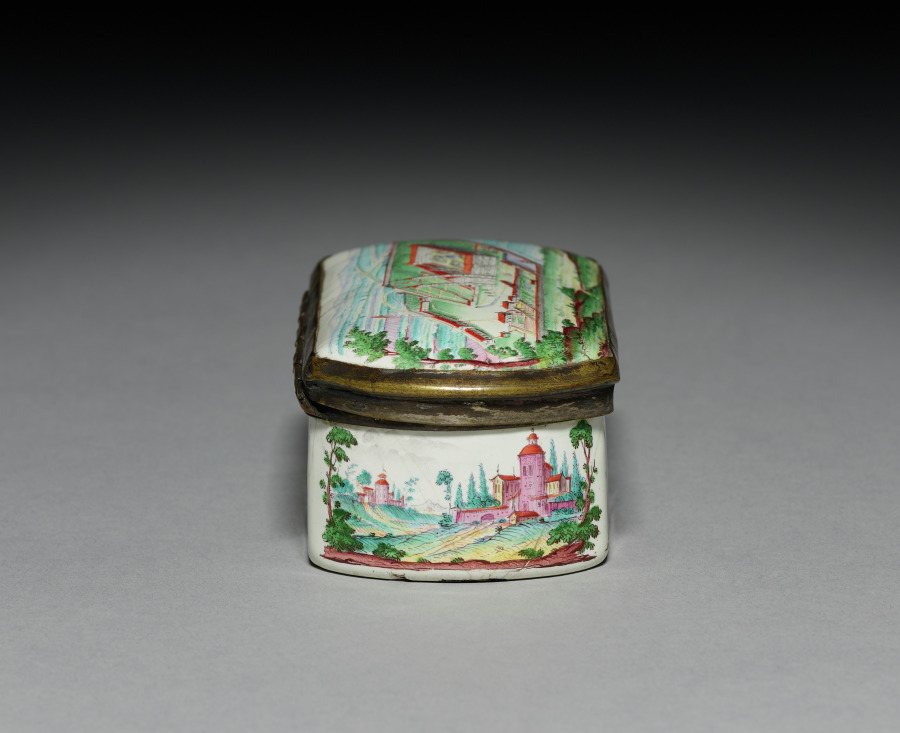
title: Snuff Box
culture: Austria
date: mid-1700s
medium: enamel on copper with metal mounts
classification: Miscellaneous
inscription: on interior of lid in a rococo cartouche: "S Hieronimus."